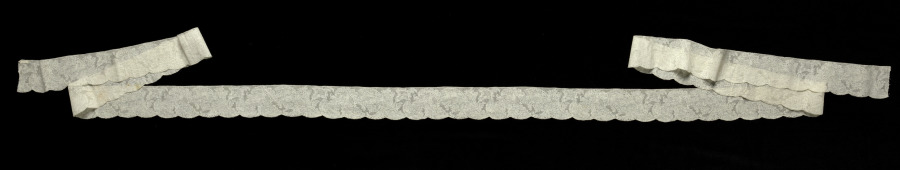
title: Lace Edging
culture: France, Valenciennes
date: 1700s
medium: Linen: bobbin lace (Valenciennes)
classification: Lace